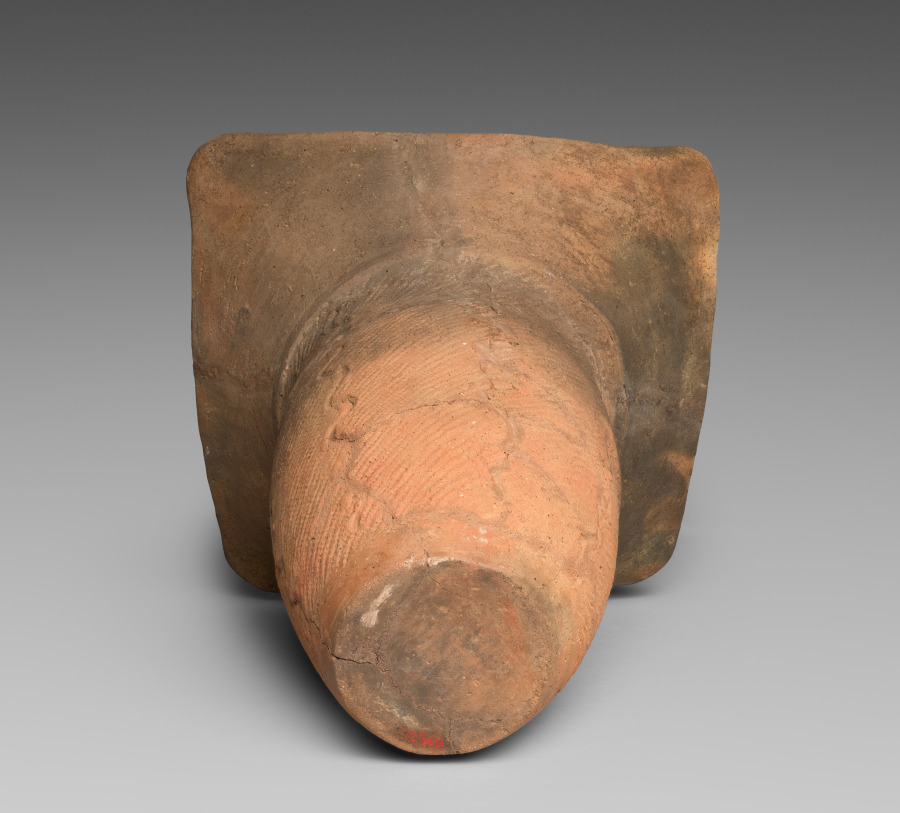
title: Deep Vessel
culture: Japan, Jōmon period (c. 10,500–300 BCE)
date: c. 2500 BCE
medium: Earthenware with impressed and carved decoration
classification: Ceramic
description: This cooking vessel was formed by piling coils of clay atop one another, smoothing and thinning the walls, and then adding surface decoration. Vertical incised squiggle lines as well as diagonal impressed cord patterns create texture. The mouth rises in four dramatic triangular forms, each with a coiled design inside.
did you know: Jōmon, impressed rope patterns, are typical of vessels of this era, so archaeologists named the period after them.